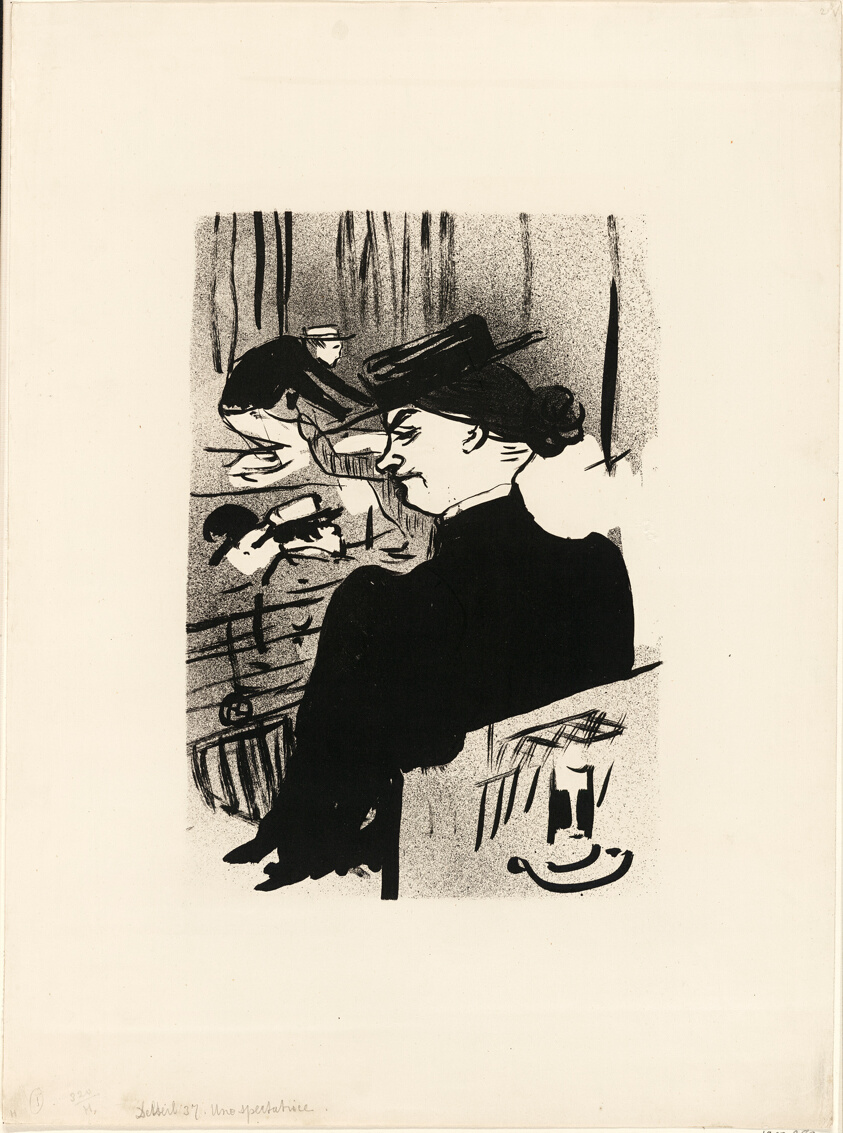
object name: Print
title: A Spectator, from Le Café-Concert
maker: Henri de Toulouse-Lautrec (French, 1864-1901); printed by Edward Ancourt & Cie (French, 19th-20th c.); published by L'Estampe originale (French, 1893-1895)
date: 1893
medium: Lithograph on ivory wove paper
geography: France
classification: lithograph; print; prints and drawing